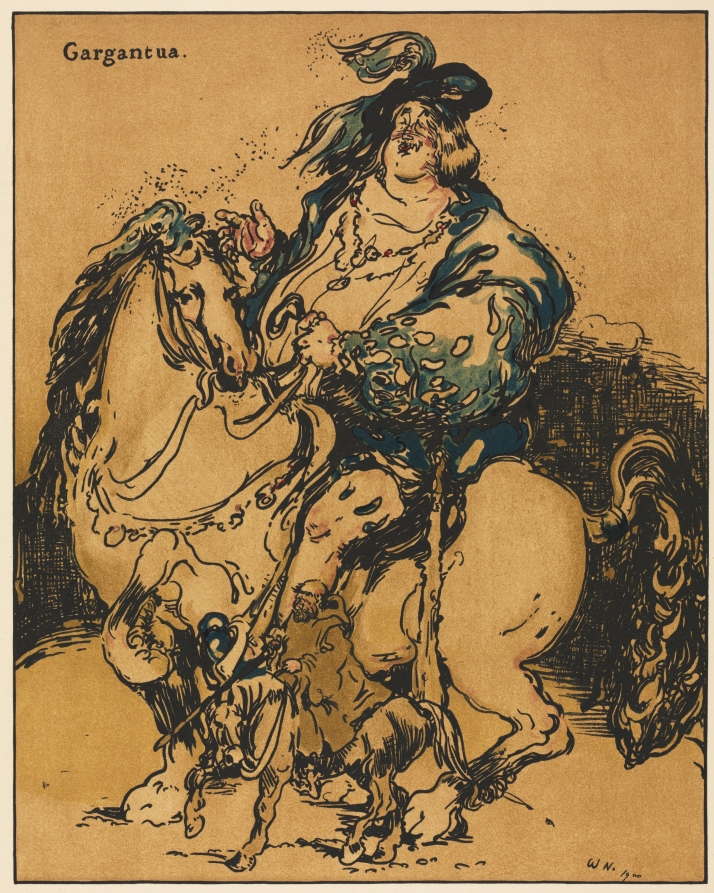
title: Characters of Romance: Gargantua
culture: England, 19th century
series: portfolio of 16 lithographs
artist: William Nicholson (British, 1872–1949)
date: 1900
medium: color lithograph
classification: Print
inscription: Verso, top right, in pencil (not artist's hand): "179496"